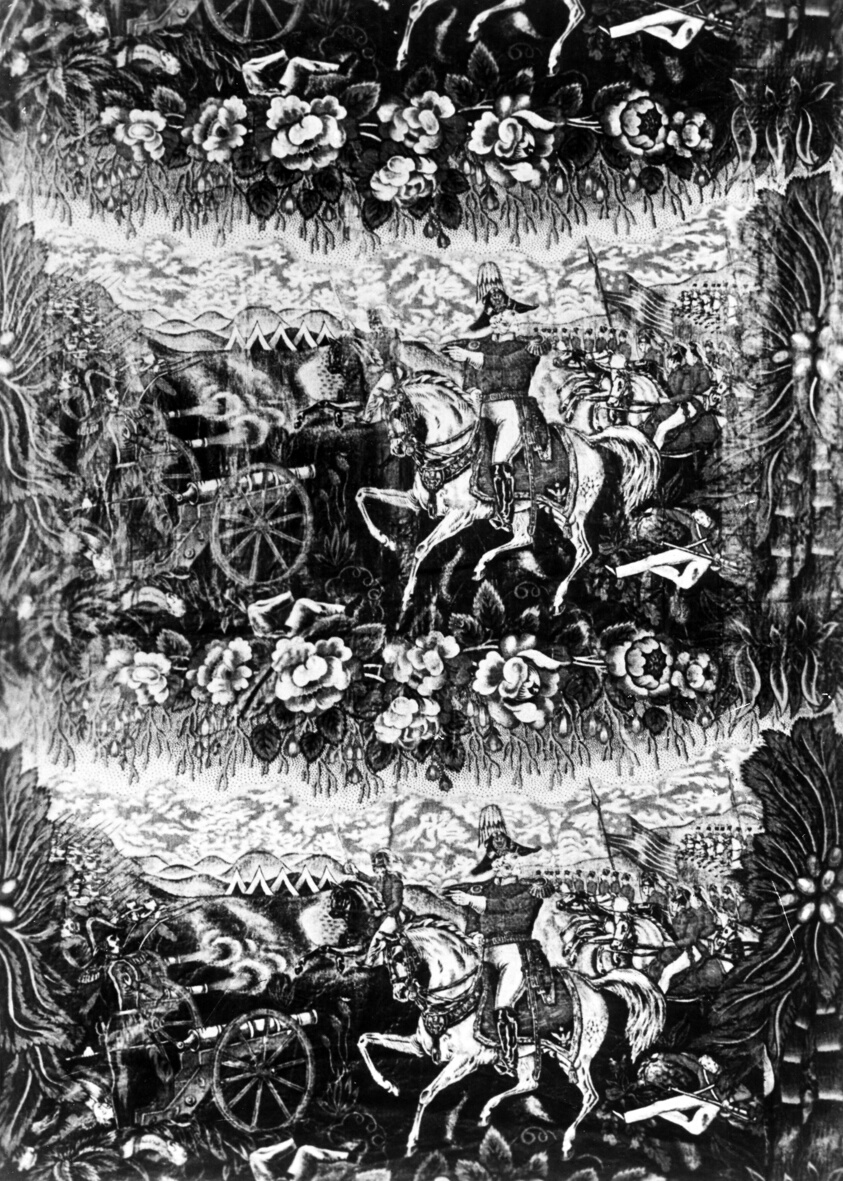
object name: Textile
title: General Taylor at the Battle of Resaca de la Palma (Furnishing Fabric)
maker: United States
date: 1846/48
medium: Cotton, plain weave; printed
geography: United States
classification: textile; weaving - printed; furnishing textile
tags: propaganda